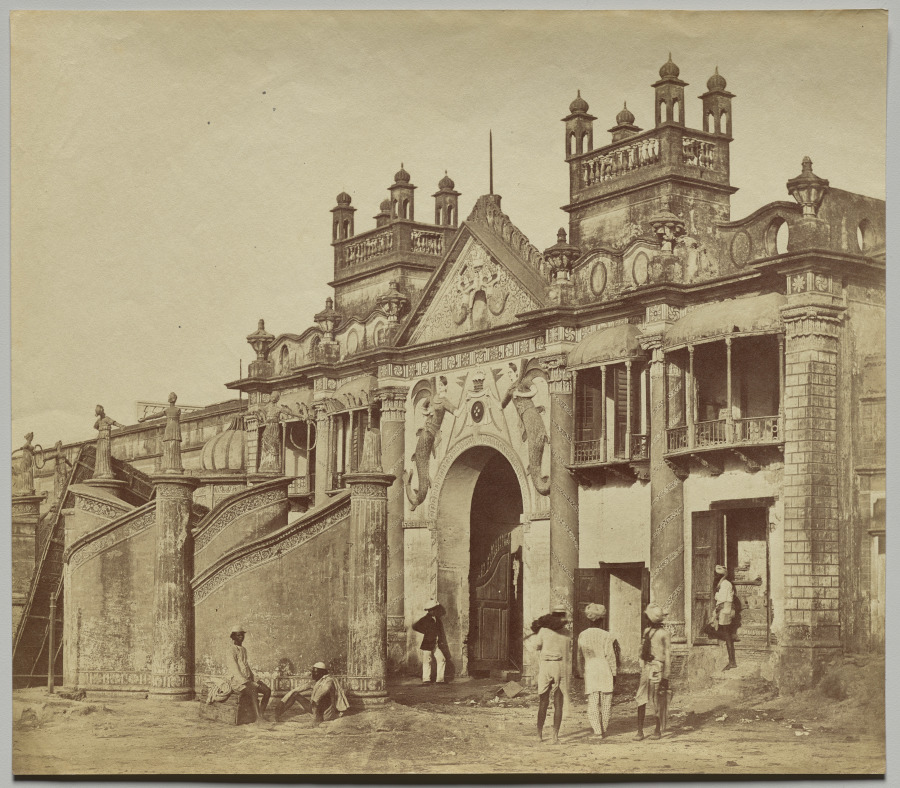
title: Gateway Leading into the Kaiserbagh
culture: England, 19th century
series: Lucknow After the Siege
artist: Felice A. Beato (British, 1832–1909)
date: 1858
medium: albumen print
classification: Photograph